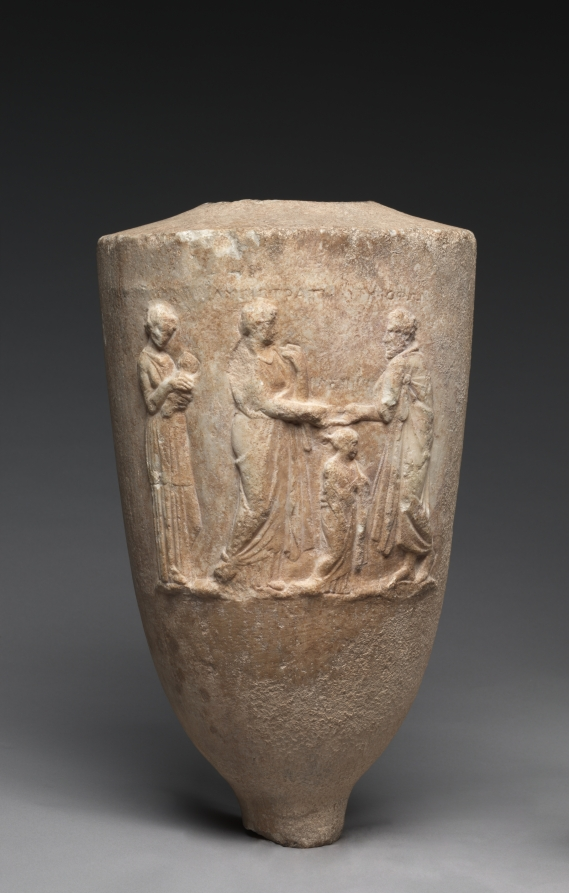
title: Gravestone in the Form of a Lekythos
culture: Greece, Athens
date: 300s BCE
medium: marble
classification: Sculpture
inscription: ΛΥΣΙΣΤΡΑΤΗ ΚΛΕ...ΤΙΜΟΦΩΝ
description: This grave marker takes the form of a lekythos, a type of vase (usually ceramic) commonly left as a grave offering in ancient Athens. Now fragmentary, it once had a foot below and a thin neck and vertical handle above. Five sculpted figures adorn its front. At left, an unnamed woman holds an infant. To their right, a woman, Lysistrate, clasps hands with a bearded man, Timophon. Between them stands a young girl, likely Kleippe, although her name is partially lost. The scene may commemorate Lysistrate’s death in childbirth, mourned by her husband and older child. Her newborn child apparently survived.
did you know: Inscriptions identify three of the four standing figures sculpted in relief.